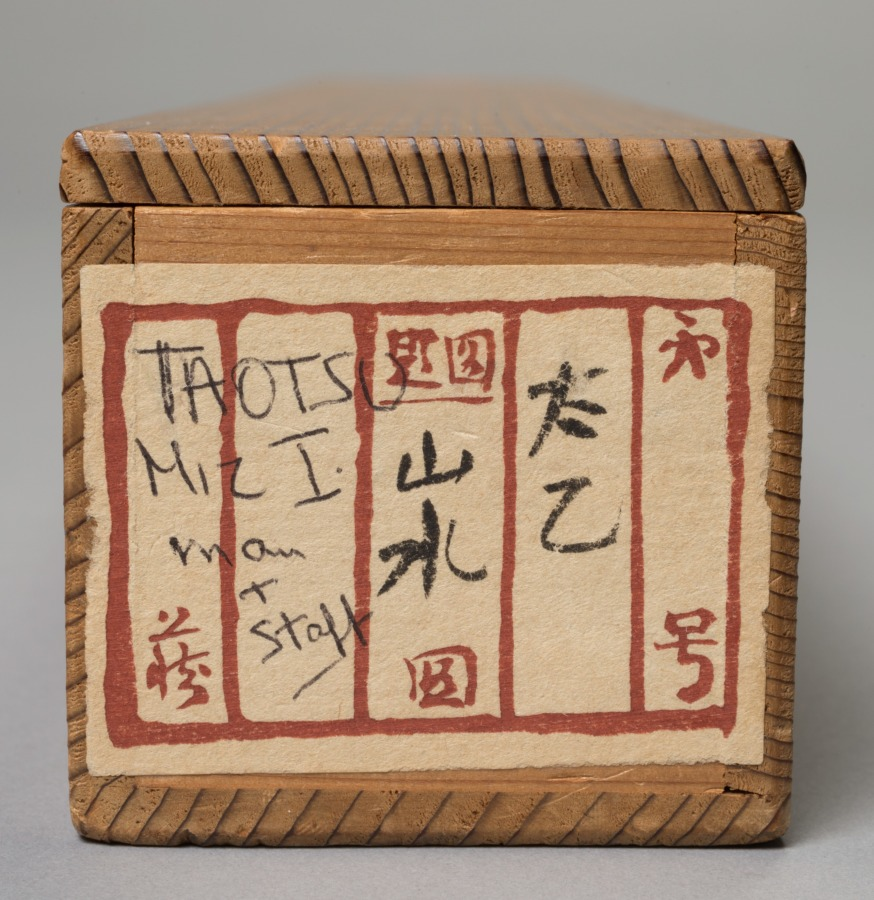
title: Casually Created on a Spring Day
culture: Japan, Edo period (1615–1868) to Meiji period (1868–1912)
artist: Murase Taiitsu (Japanese, 1803–1881)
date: c. 1825–81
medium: hanging scroll; ink on paper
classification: Painting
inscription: artist's inscription, signature, and seal at top of painting.